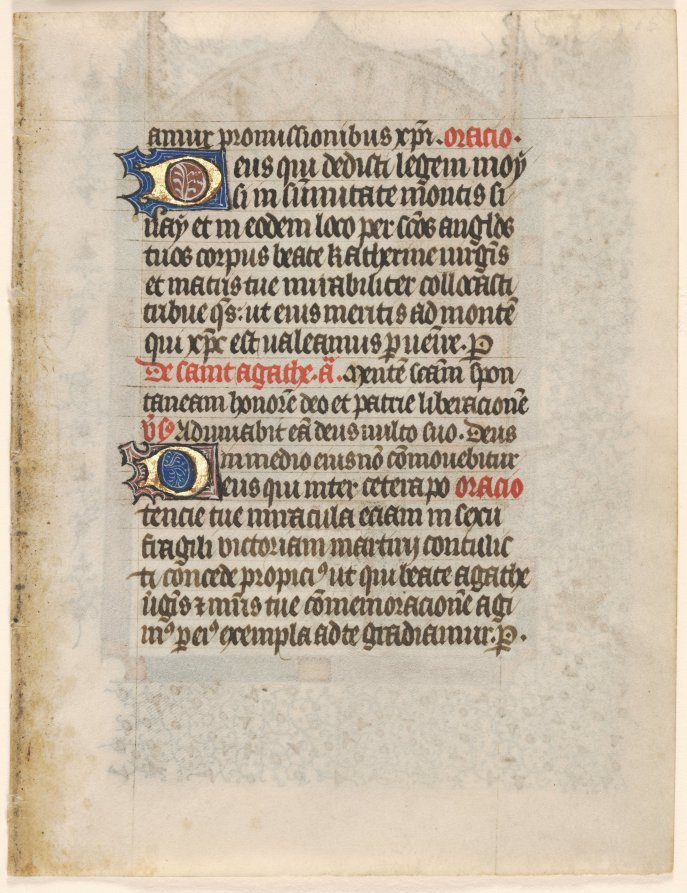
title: Leaf from a Book of Hours: St. Barbara (6 of 6 Excised Leaves)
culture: France, Metz, 15th century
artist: Henri d'Orquevaulx (French)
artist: or Workshop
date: c. 1420–30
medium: ink, tempera, silver, and gold on vellum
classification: Manuscript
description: This leaf survives from what must have been an extraordinarily rich book of hours. The elaborate Passion cycle and Suffrages point to an important commission. Evidence within the calendar and texts suggests that Metz was probably the place of production. Situated on the Moselle River, Metz was the cultural and commercial capital of Lorraine during the 1400s, as well as the location of an important bishopric. It was thus the center of a growing book trade. The illuminations appear to come from the workshop of Henri d'Orquevaulx, a documented Metz manuscript painter. Compositionally, structurally, and stylistically, the miniatures suggest strong links to Netherlandish illumination. Details such as the tub, ewer, towel, and fireplace in the Nativity are typical of the northern love of crowded and unusual compositions, as well as domestic details. It is not known whether d'Orquevaulx came originally from the Netherlands or whether he simply worked or trained there at some point in his career.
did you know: Ranging from lavishly decorated by hand with gold leaf to printed on paper with no images, books of hours were customizable and could be highly personalized to an individual’s tastes, budget, and interests.